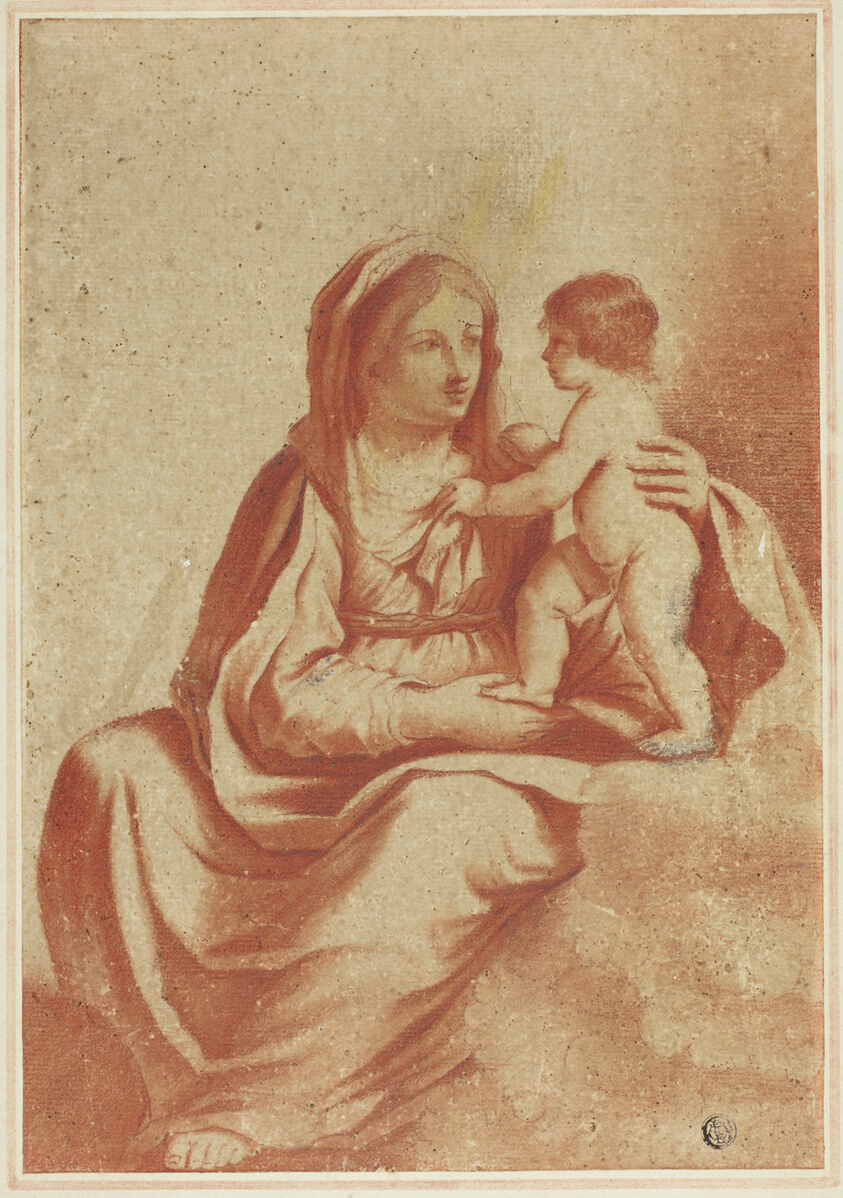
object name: Drawing and Watercolor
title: Virgin and Child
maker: After Guercino; Italian, 1591-1666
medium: Red chalk, with touches of black chalk, on brown laid paper, laid down on cream laid card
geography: Italy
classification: chalk; drawings (visual works); prints and drawing